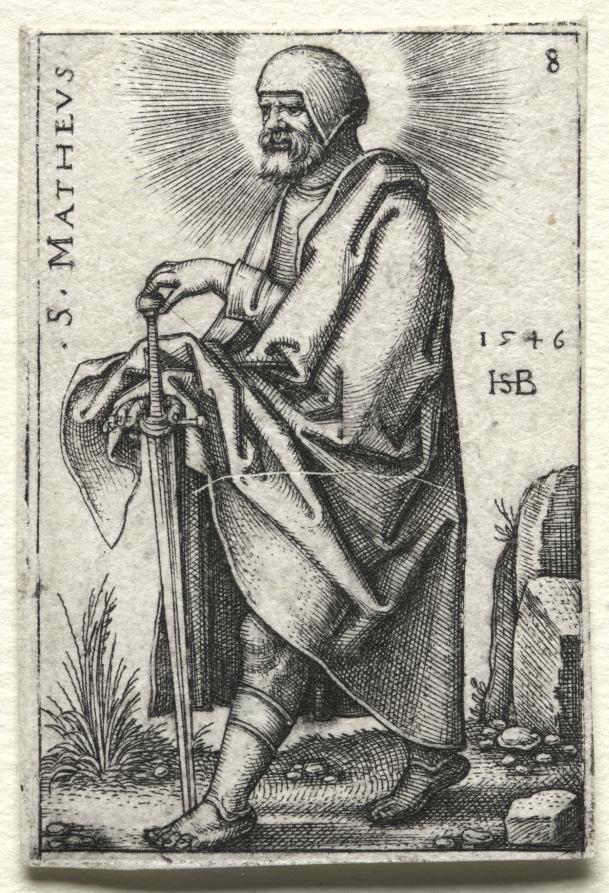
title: St. Mark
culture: Germany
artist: Hans Sebald Beham (German, 1500–1550)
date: 1545–1546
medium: engraving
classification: Print